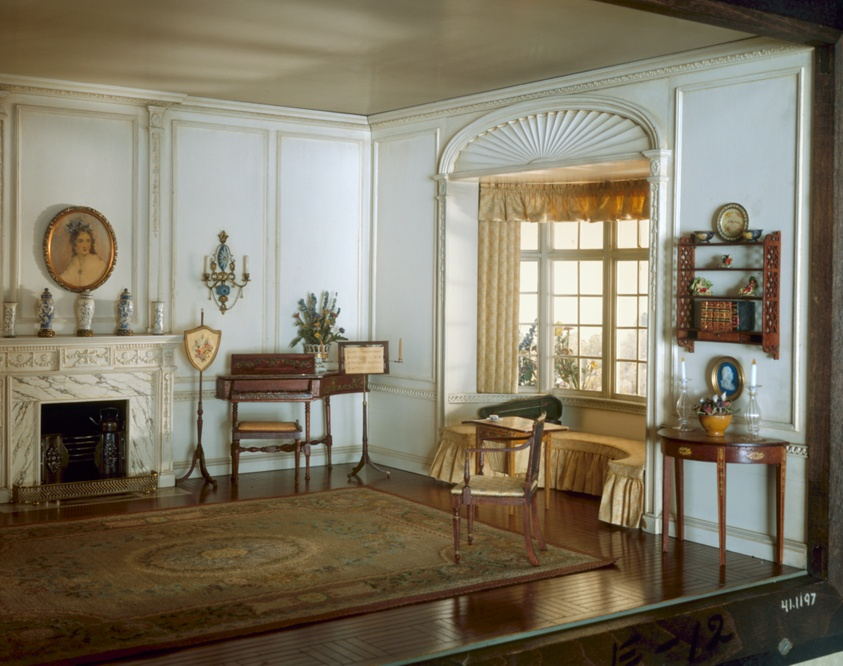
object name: Miniature room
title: E-12: English Drawing Room of the Georgian Period, c. 1800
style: georgian, european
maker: Designed by Narcissa Niblack Thorne; American, 1882-1966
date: c. 1937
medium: Miniature room, mixed media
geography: United States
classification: miniature; thorne rooms